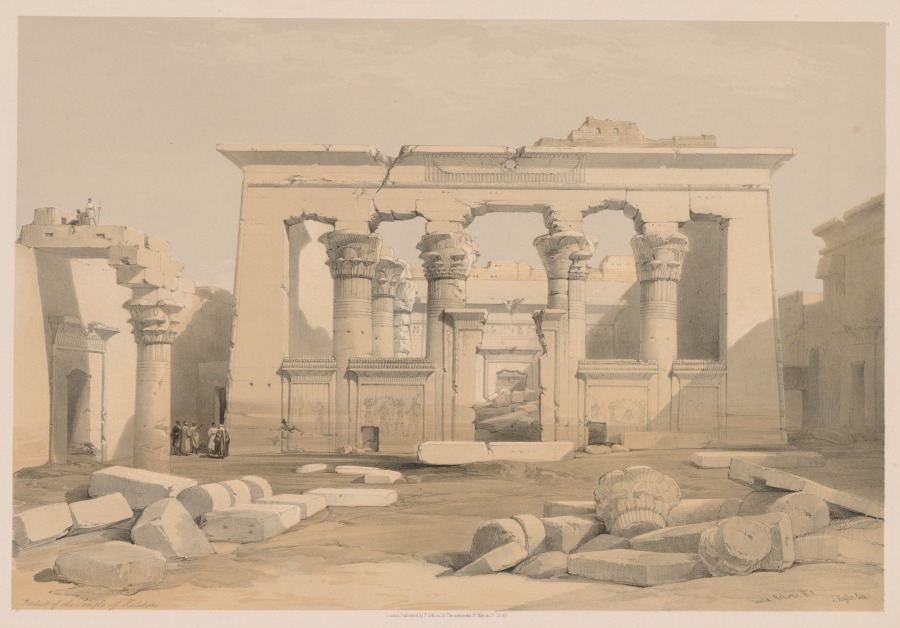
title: Egypt and Nubia: Volume I - No. 28, Portico of the Temple of Kalabshi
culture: England, 19th century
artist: Louis Haghe (British, 1806–1885)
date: 1838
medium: color lithograph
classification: Print